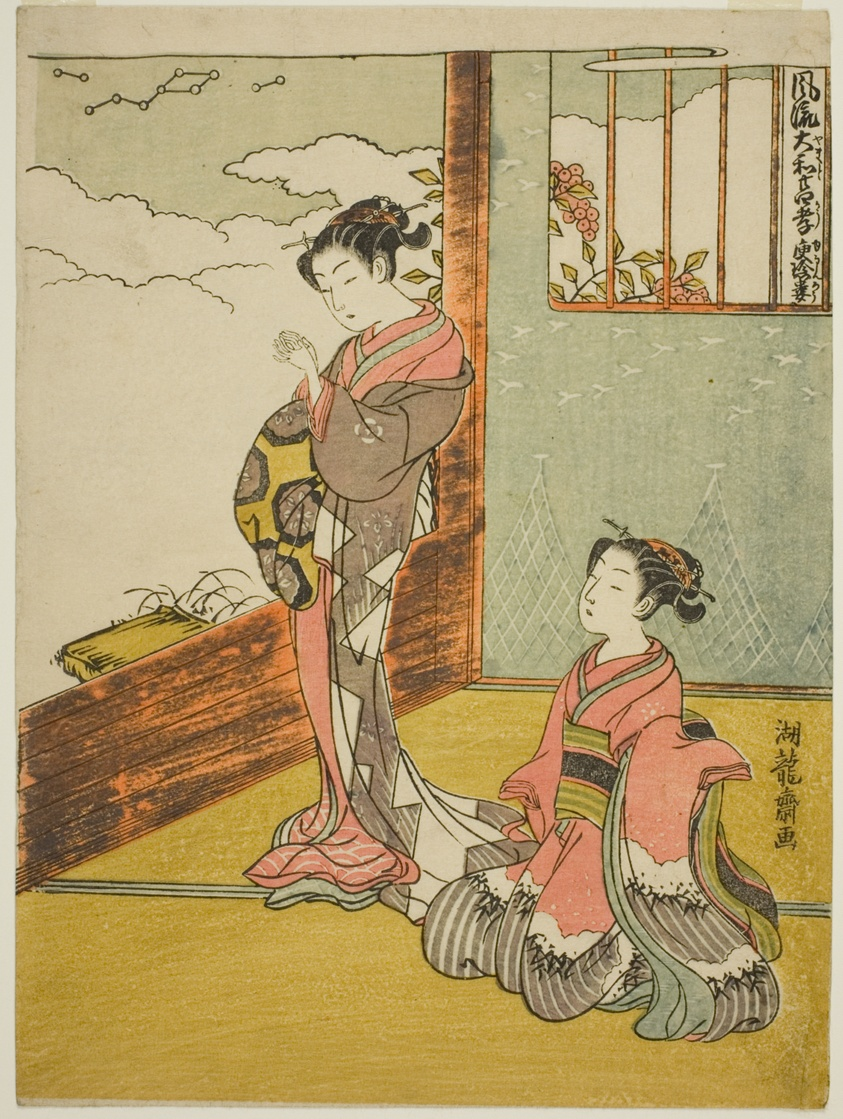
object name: Print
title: Yu Kinro (Chinese: Yu Qianlou), from the series "Fashionable Japanese Versions of the Twenty-four Paragons of Filial Piety (Furyu Yamato nijushiko)""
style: Japanese (culture or style)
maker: Isoda Koryusai (Japanese, 1735-1790)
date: c. 1770/72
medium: Color woodblock print; chuban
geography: Japan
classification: woodblock print; print; asian art